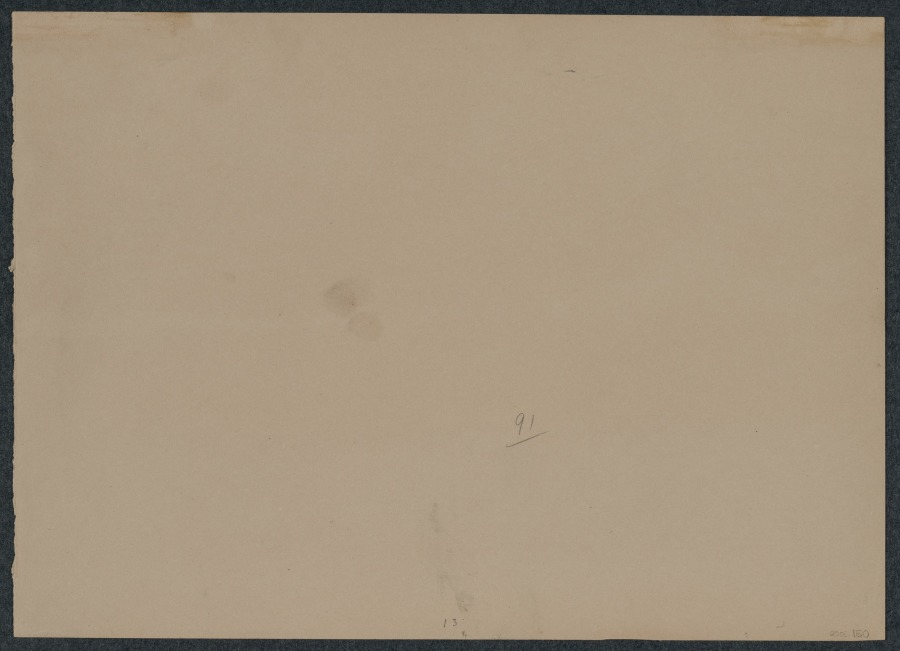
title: Storm Ending, Norwegian Fijord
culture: England, 20th century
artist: Muirhead Bone (British, 1876–1953)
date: c. 1896–1953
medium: watercolor and graphite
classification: Drawing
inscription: Lower right, in graphite: Muirhead Bone